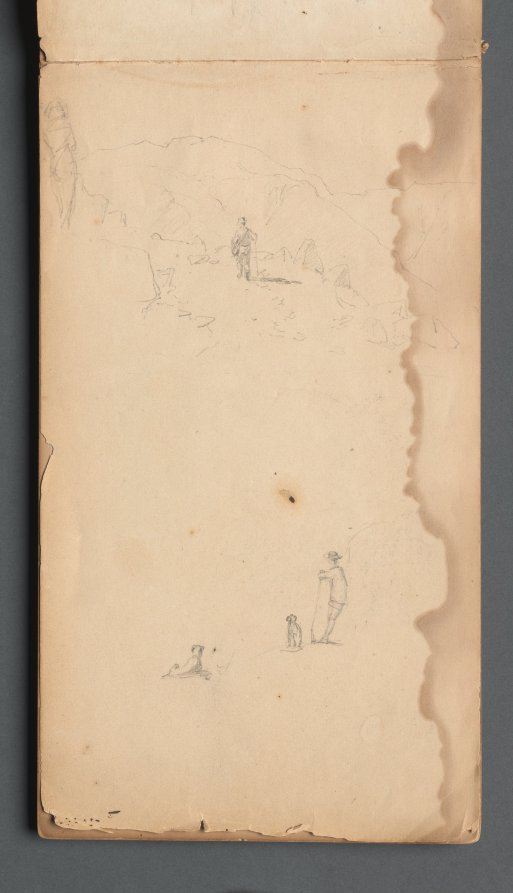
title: Sketchbook, page 02: Figure in a Landscape with Dog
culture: America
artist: Sanford Robinson Gifford (American, 1823–1880)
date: 1859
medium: graphite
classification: Bound Volume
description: Gifford was an American landscape painter belonging to the second generation of Hudson River school artists. Based in New York City with a studio at the Tenth Street Studio Building, Gifford took annual summer trips to the Catskills, the Adirondacks, and other scenic locations in New England. This sketchbook accompanied the artist on his expedition in 1859 to New Hampshire and Maine, where he drew sites such as Dixville Notch, the White Mountains, and Peaks Island, Casco Bay. Gifford used such graphite studies as the basis for oil paintings worked up in his studio, such as A Home in the Wilderness (1866).